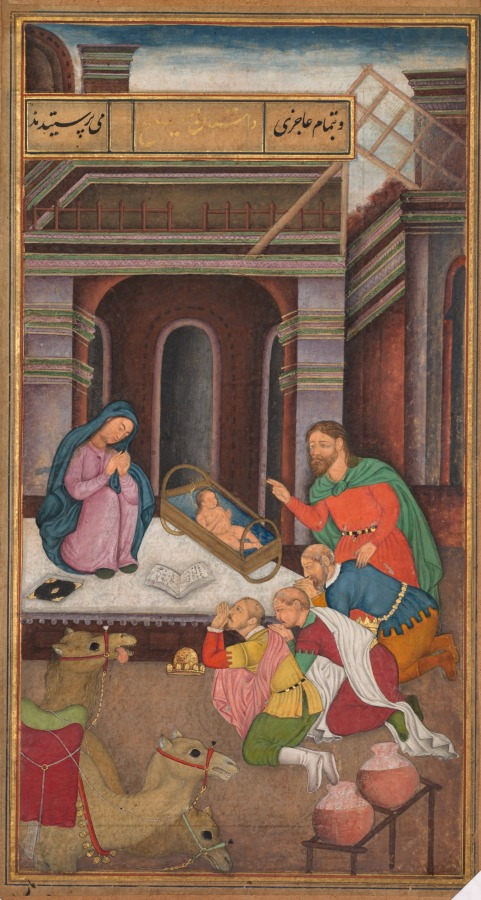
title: The Adoration of the Magi, from a Mirror of Holiness (Mir’at al-quds) of Father Jerome Xavier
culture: Northern India, Uttar Pradesh, Allahabad, Mughal period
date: 1602–4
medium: Gum tempera, ink, and gold on paper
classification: Manuscript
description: In this Nativity scene, familiar in Christian contexts, Mary and Joseph present the infant Jesus to the three Magi, who have placed their crowns on the ground in homage to the King of Kings. The three Magi are portrayed in Portuguese costumes to indicate to a Mughal audience that they are foreigners who believed in Christ. The artist cleverly and humorously indicates that the Magi have just arrived in Bethlehem by depicting their three camels in the bottom corner. One exhausted camel’s tongue hangs out the side of his mouth, while the other two animals lean eagerly toward a pair of water jugs.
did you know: The books next to newborn Jesus indicate that his birth fulfills a prophecy.